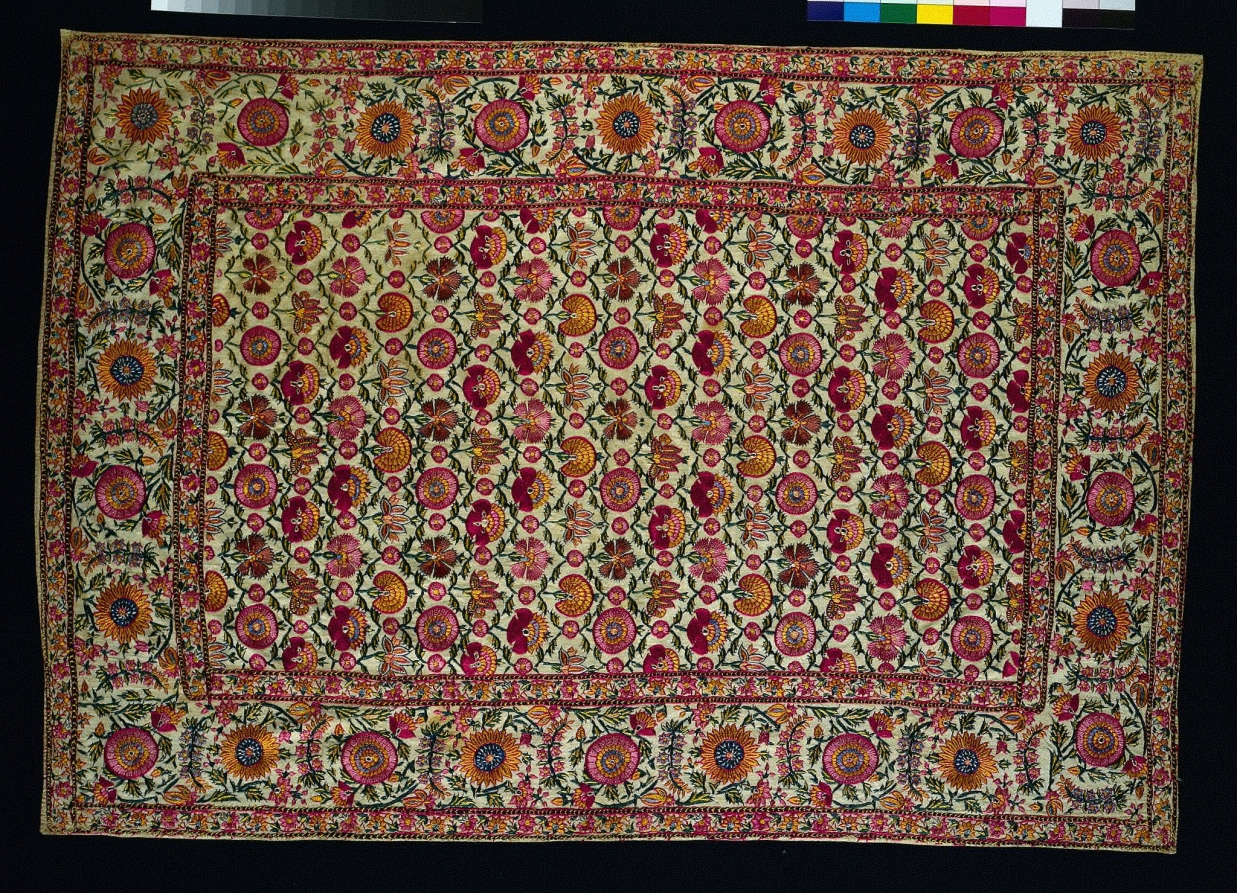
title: Embroidered Cover or Hanging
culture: India, Delhi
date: 1600s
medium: Silk on linen tabby ground; embroidery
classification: Embroidery